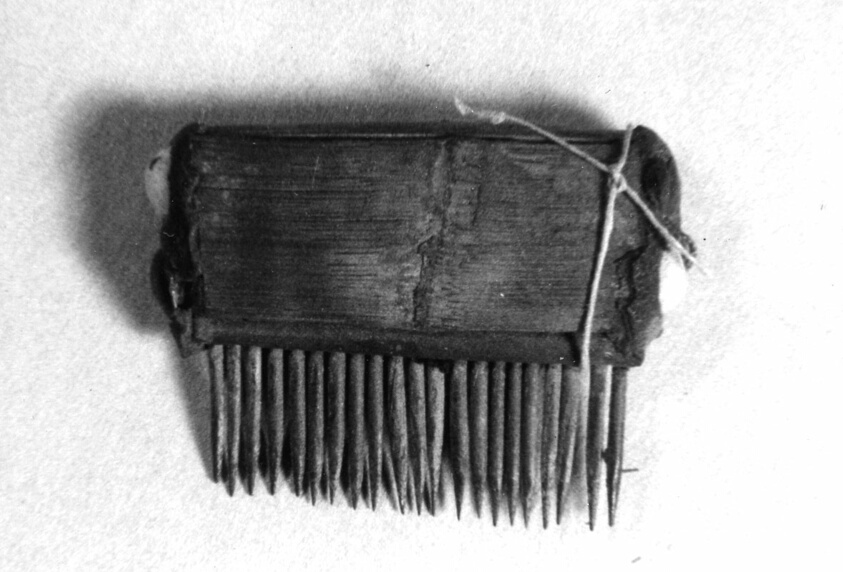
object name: Textile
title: Weaving Comb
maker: Peru, Possibly central or south coast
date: A.D. 1000/1476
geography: Peru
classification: textile; textile working equipment; weaving; accessories (object genre)